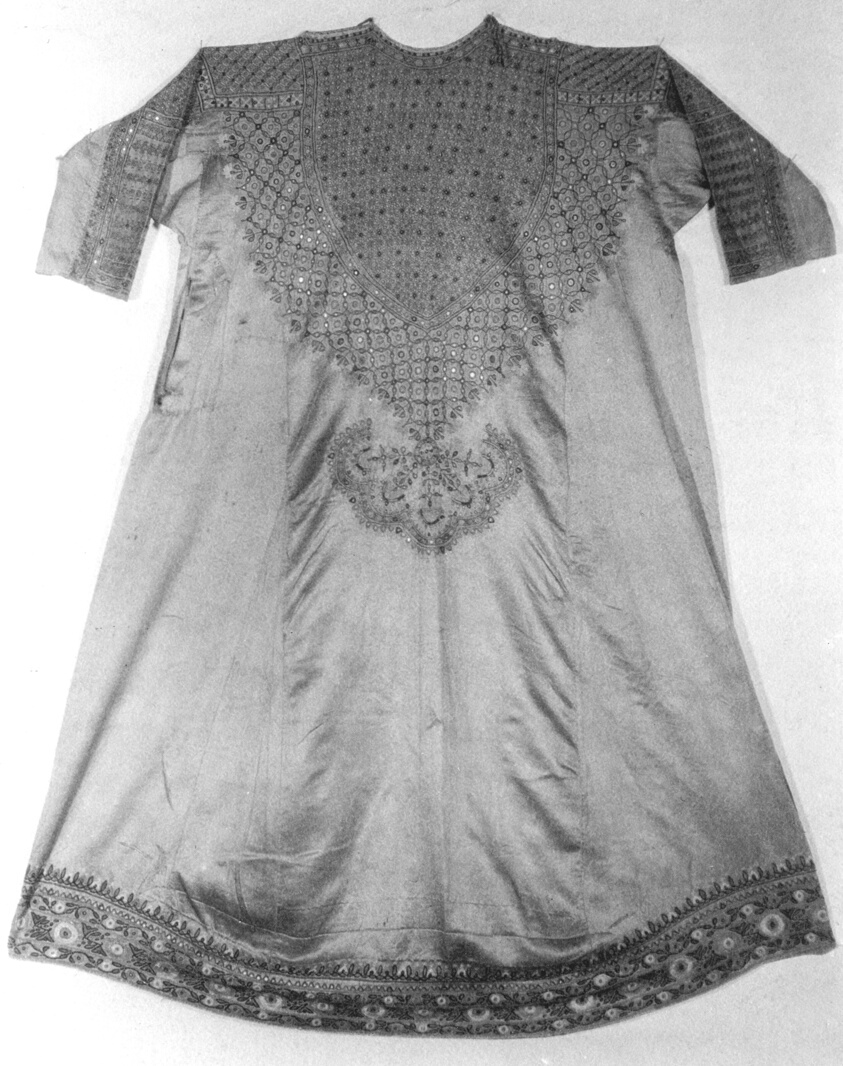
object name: Textile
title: Shirt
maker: India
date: 19th century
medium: Plain simple satin, orange silk; embroidered with stem, chain, Holbein, satin, and buttonhole stitches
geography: India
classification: textile; costume; dress (garment); clothing